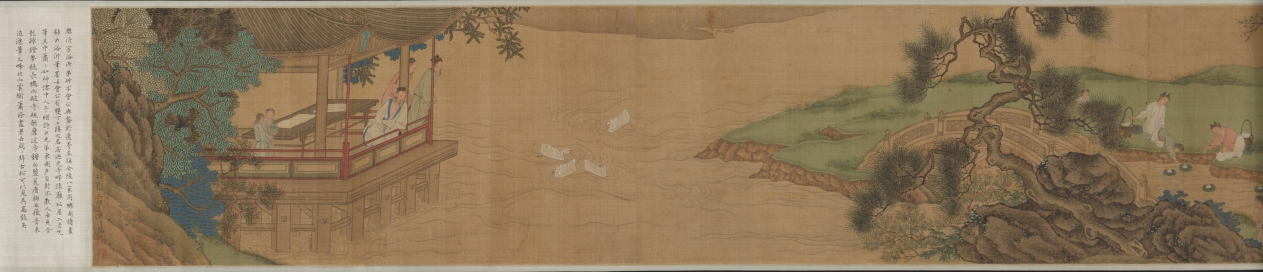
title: Purification at the Orchid Pavilion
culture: China, Qing dynasty (1644-1911)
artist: Fan Yi (Chinese, c. 1615–before 1688)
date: 1671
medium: Handscroll; ink and color on silk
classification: Painting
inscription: Artist's inscription, signature, and 2 seals: Painted by Fan Yi of Zhongfu during the second month of winter of the xinhai year [1671]. [2 seals] Fan Yi zhi yin, Zi yu yi.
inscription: Title on the frontispiece by Monk Yueshan (1629-1709).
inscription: 3 colophons and 13 additional seals: 1 colophon, dated 1707, and 6 seals of Yueshan; 2 colophons and 3 seals of Wong Kwan-Shut (Huang Junshi) 黃君實 (b. 1934); 2 seals of Fu Shen 傅 申 (b. 1937); 2 seals of Tessai Tomioka 富岡鐵齋 (1836-1924).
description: By the 1600s, the historic gathering at Lanting, Zhejiang province, in 353 CE was a common theme in Chinese painting. Originally based on a composition attributed to Li Gonglin (1049– 1106), now lost, Wu school artists revived the theme. Fan Yi, the brother of the artist Fan Qi from Nanjing, used delicate brushwork and luminous colors to depict the spring gathering.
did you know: The gathering’s host is in the Orchid Pavilion at the end of the scroll, representing an episode known as “Wang Xizhi Watching the Geese 王羲之觀鵝圖.”